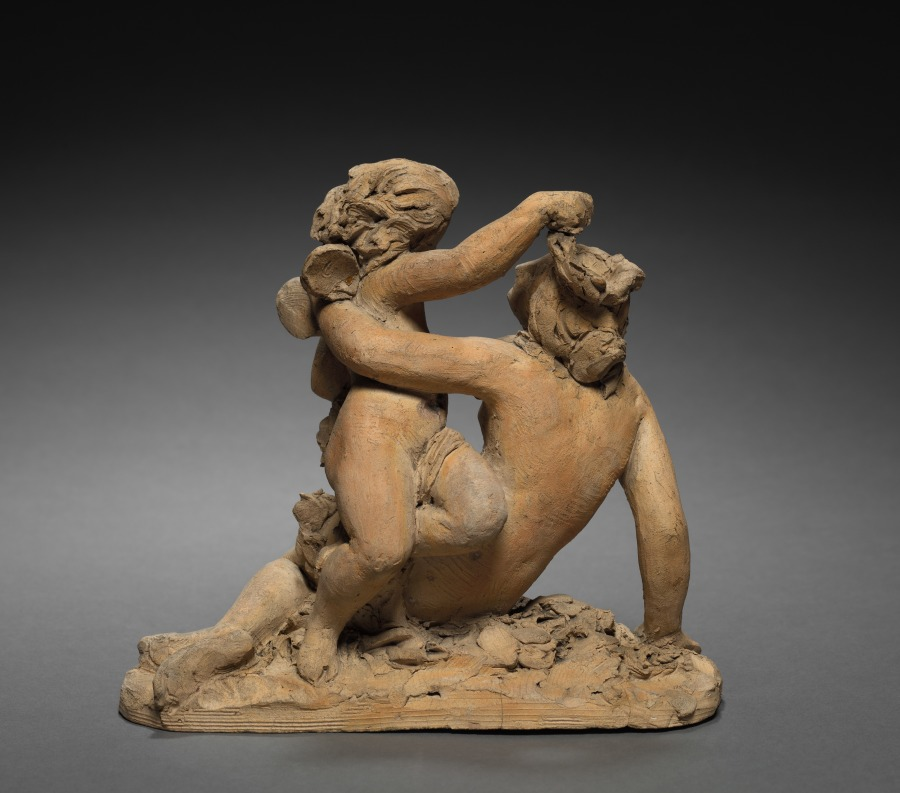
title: Venus and Cupid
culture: France, 19th century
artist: Jean-Jacques Feuchère (French, 1807–1852)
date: c. 1840–1850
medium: terracotta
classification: Sculpture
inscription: in ligature incised into base at front right corner: "Feuchere"; below are some marks that might be a date, but are illegible.